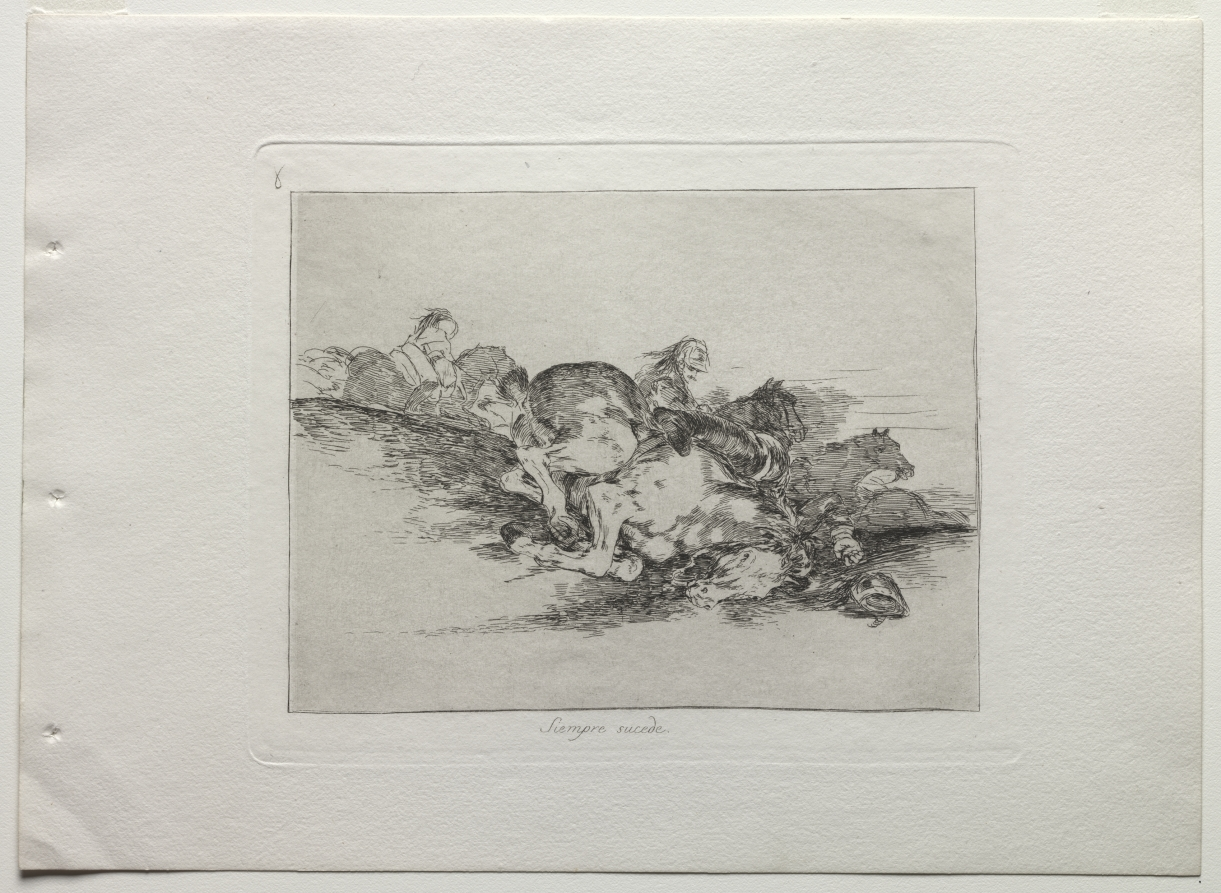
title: Disasters of War: It Always Happens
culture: Spain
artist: Francisco de Goya (Spanish, 1746–1828)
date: 1810–1820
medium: etching and drypoint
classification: Print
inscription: title printed below image: "Siempre Sucede;" "#8" printed top left corner